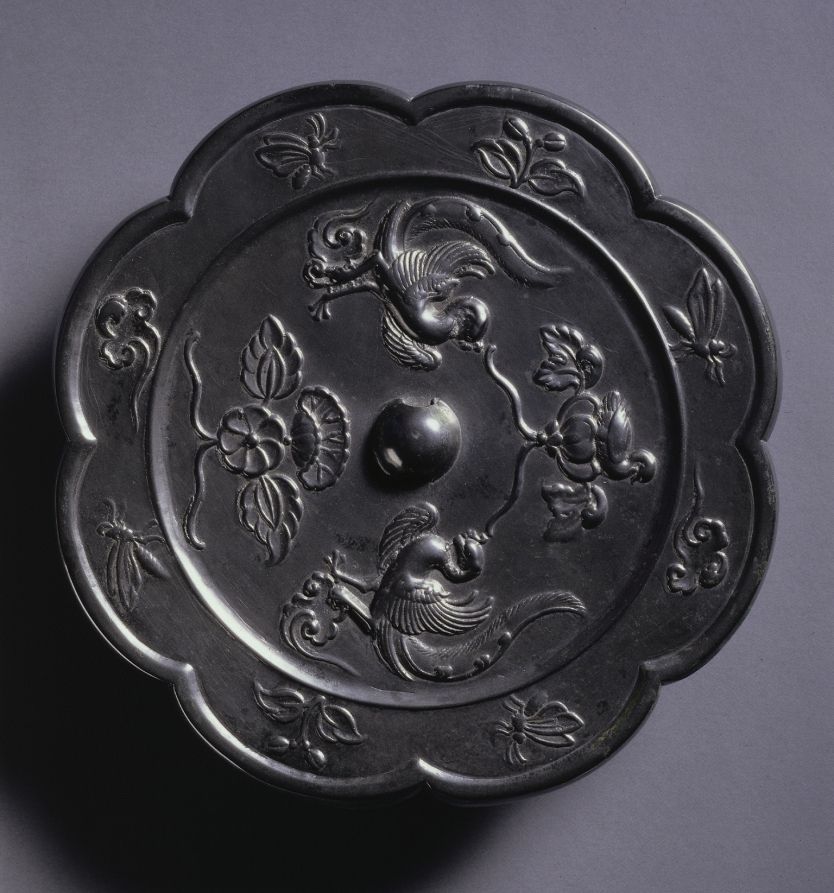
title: Lobed Mirror with Paired Phoenixes, a Nestling Bird, and a Lotus Blossom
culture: China, Tang dynasty (618-907)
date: 700s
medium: bronze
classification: Metalwork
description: Bronze mirrors typically have one polished reflective side and a decorative back with a knob to be able to lift it.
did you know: From flowers to animals, each detail on this mirror has symbolic meaning.